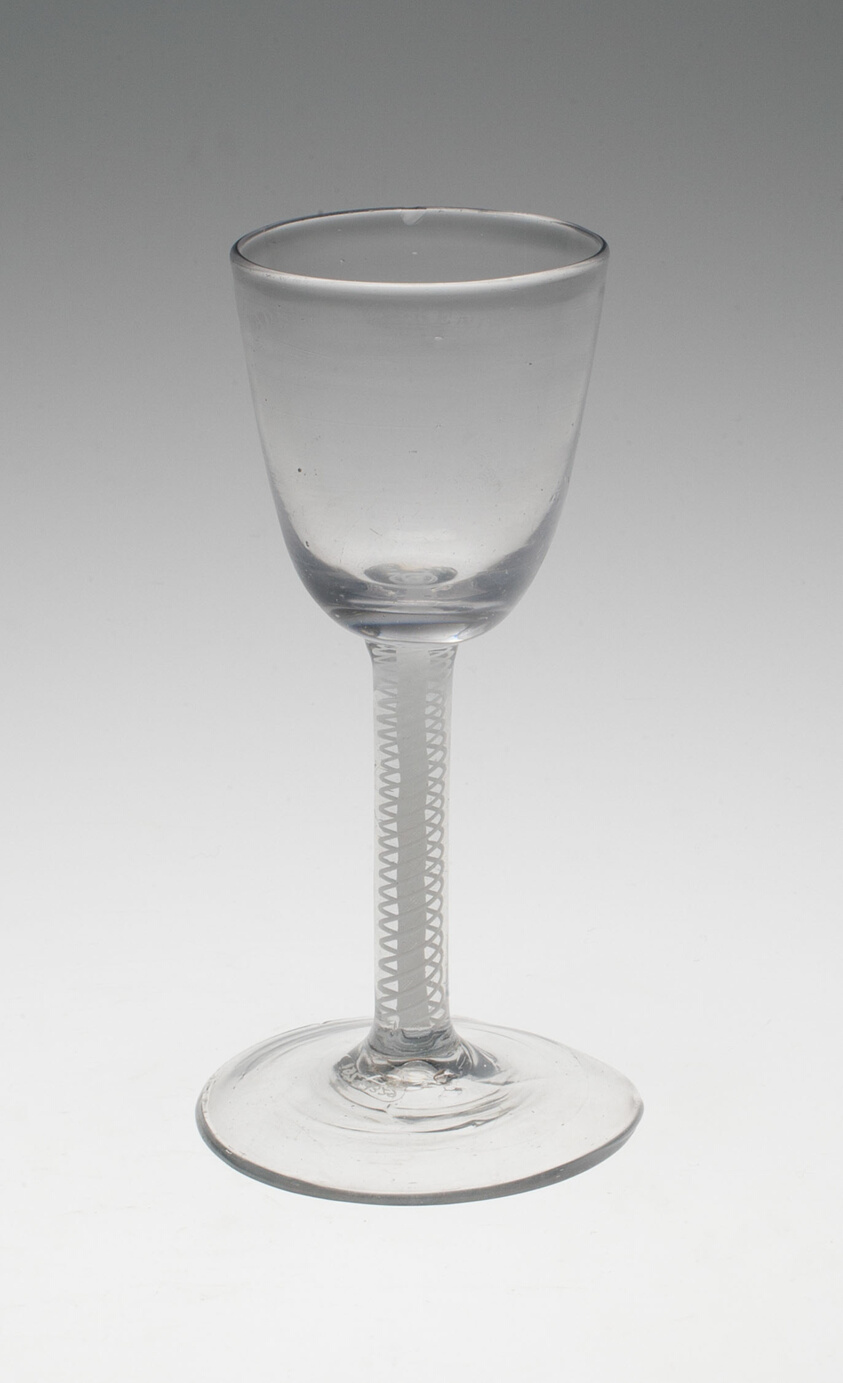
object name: Glass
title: Wine Glass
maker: England or Netherlands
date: Mid 18th century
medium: Glass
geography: England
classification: drinking vessel; glass; european decorative arts